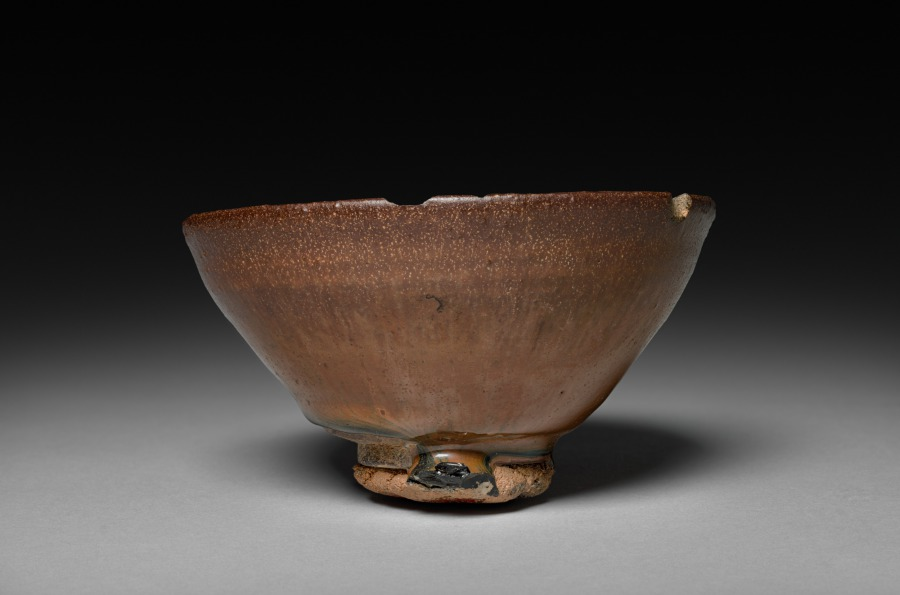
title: Tea Bowl: Jian ware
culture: China, near Shui ch'i, Song dynasty (960-1279)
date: 960–1279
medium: stoneware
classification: Ceramic